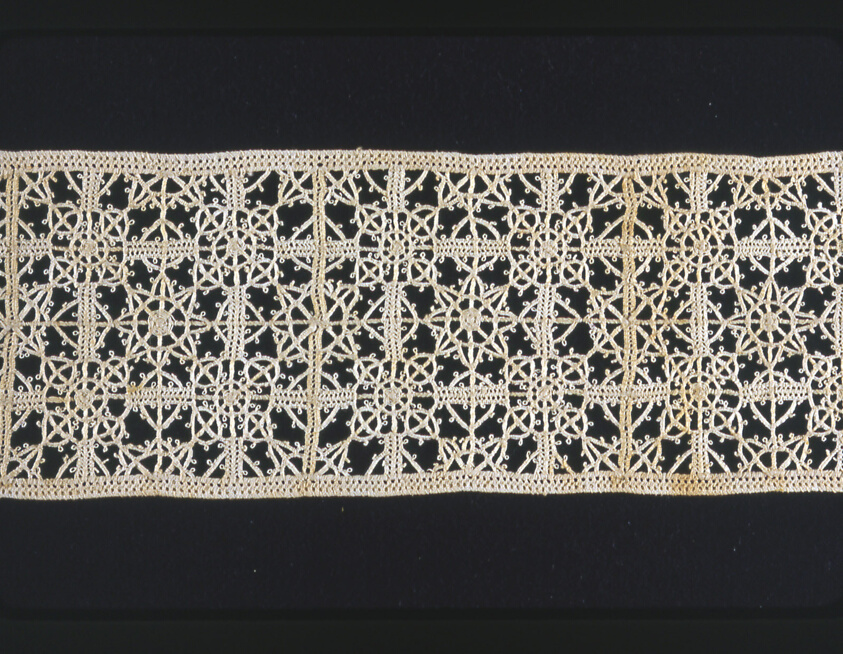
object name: Textile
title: Insertion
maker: Possibly made at the Aemilia Ars Workshop, 1898–1914; Italy, Bologna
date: 1900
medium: Cotton, plain weave; cut work with needle lace inserts; pulled thread work in double hem and overcast stitches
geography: Bologna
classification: textile; lace - needle